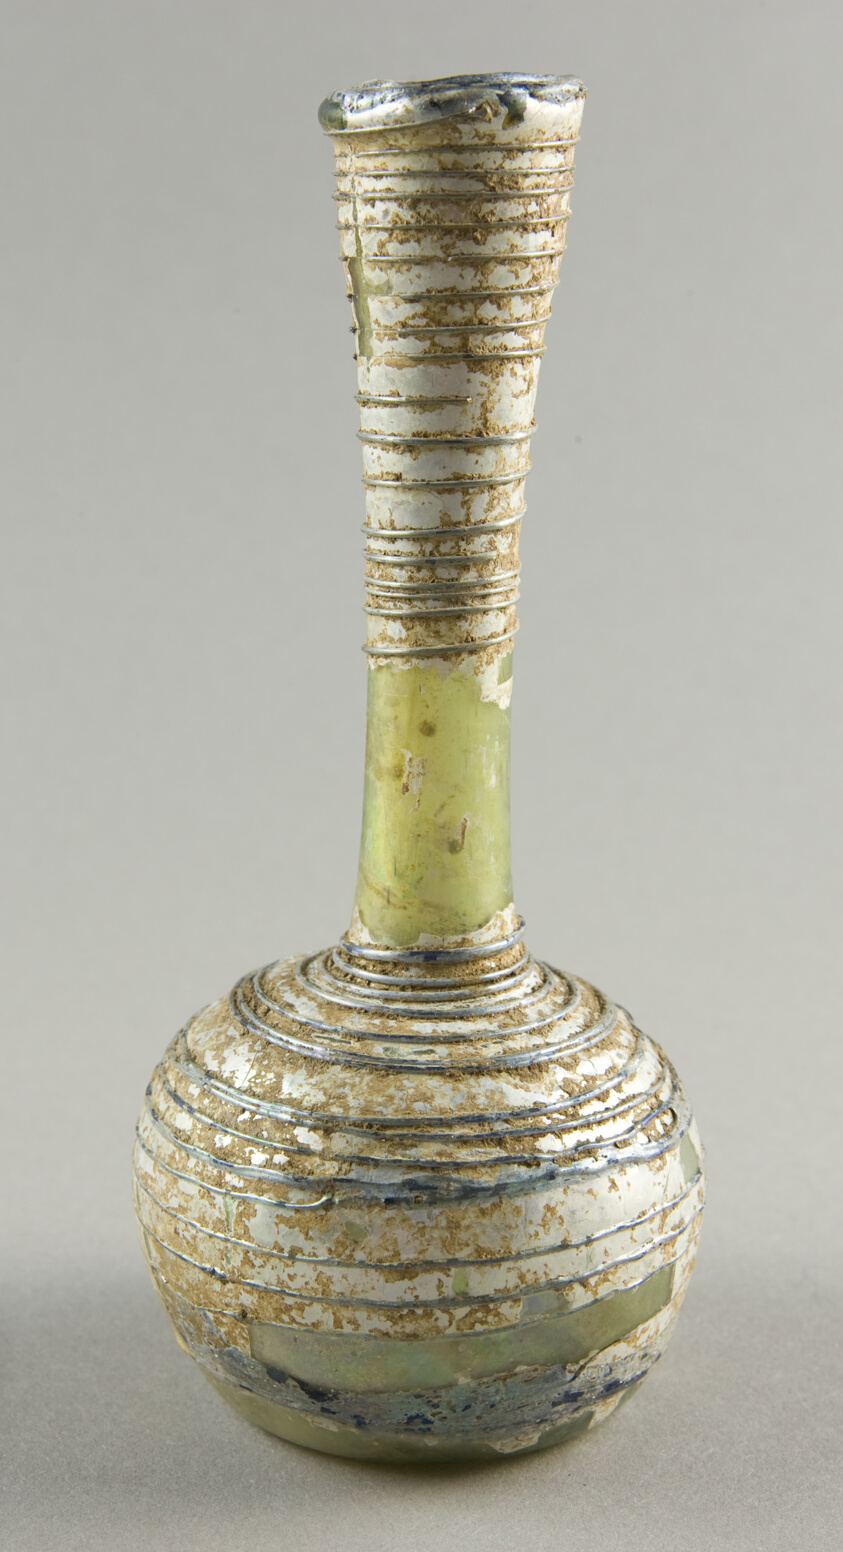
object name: Vessel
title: Bottle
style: syrian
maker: Roman; Levant or Syria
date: 4th century or later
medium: Glass, blown technique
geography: Syria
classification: glass; vessel; ancient art